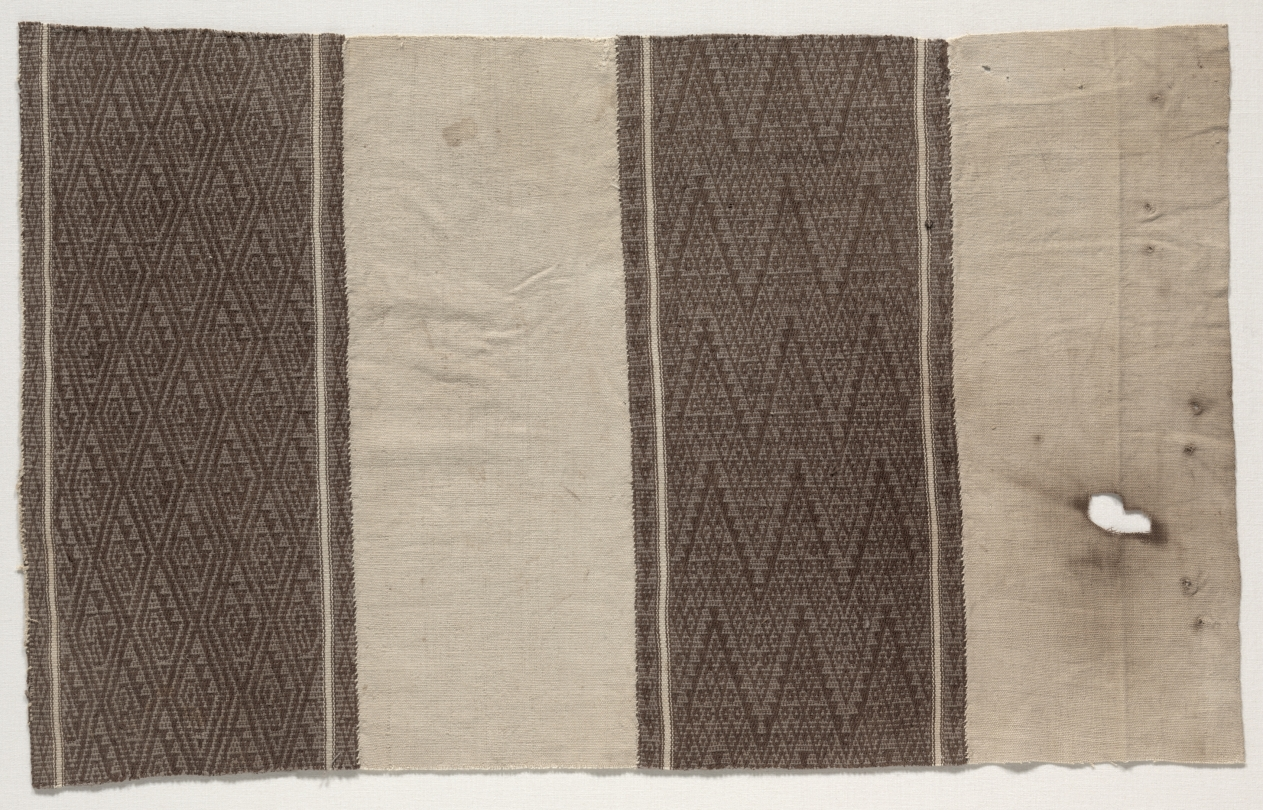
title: Fragment formed of Four Separate Fabrics Joined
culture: Peru, Central Coast, Chancay, 12th-15th century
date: c. 1100–1400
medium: two pieces plain cloth, two pieces compound twill; cotton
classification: Textile